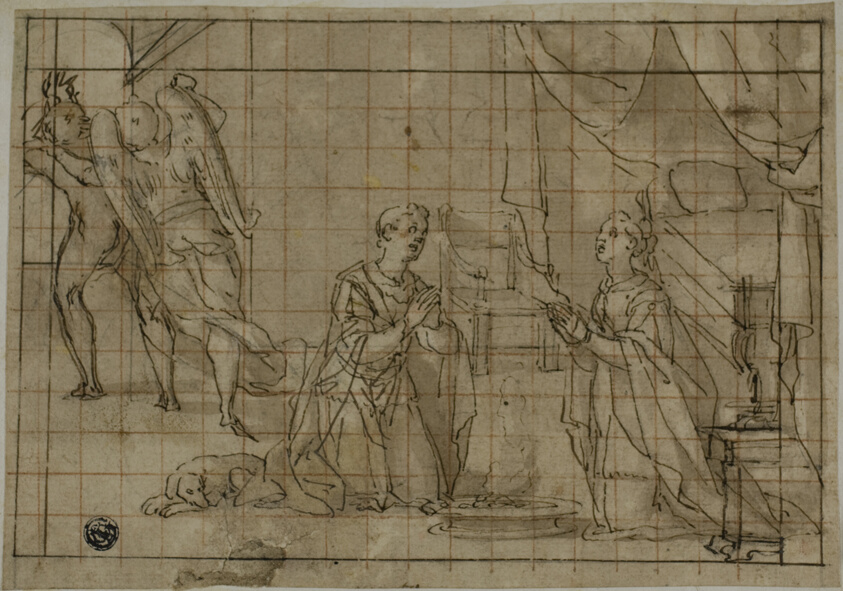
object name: Drawing and Watercolor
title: Tobias and Sarah Praying on Their Wedding Night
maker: Lazzaro Tavarone (Italian, 1556-1641)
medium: Pen and brown ink with brush and brown wash, over black chalk, on cream laid paper, squared in red chalk, laid down on ivory laid paper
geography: Italy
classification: ink with wash; drawings (visual works); prints and drawing